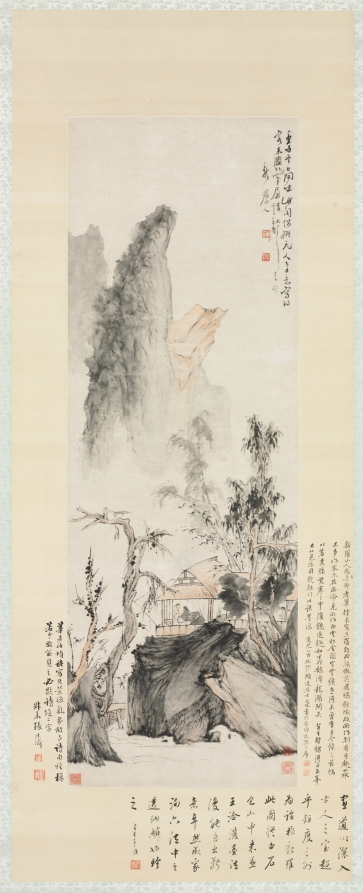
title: Conversation in Autumn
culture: China, Qing dynasty (1644-1911)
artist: Hua Yan (Chinese, 1682–c. 1765)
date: 1732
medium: Hanging scroll; ink and light color on paper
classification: Painting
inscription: Artist's inscription, signature, and 2 seals: On a winter day in the renzi year [1732], while leisurely sitting in my mountain pavilion, I happened to have imitated the brush style of Yuan masters on the two verses: "A guest came from the dusty world for a visit; in the small cottage we talked about the sound of autumn." Xin luo shan ren 新羅山人 [seals] Hua Yan 華喦; Qiuyue 秋岳.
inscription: 1 colophon and 2 seals of Zhang Tingji 張廷濟 (1768–1848): Old Hua [Yan], in this painting, was able to evoke the mood of desolation in nature and match the poetry elegantly. If Fangweng [Lu You 陸游 (1125–1210)] saw this, he would inscribe the painting with two words "idyllic world 詩境."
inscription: 新羅山人為吾鄉老輩，擅長寫生。羅致羽族，翫其飛鳴飲啄。故所作別有生趣。山水不多。作客冬在西泠，見所白雲松舎圖。空靈曠逸，得未曾有，至今憶之。兹幅以蒼秀勝，荒寒之中，復饒逸趣。如坐我鵠灣、龍瀃間矣。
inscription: 1 colophon and 1 seal of Zhu Angzhi 朱昂之 (1764–1841): The highest achievement in the art of painting is to penetrate deeply into the chamber of old masters, but at the same time transcend the bounds of conventional rules. This painting of Xinluo is derived from [the style of] Baishi (Shen Zhou 沈周, 1427–1509) and Baoshan (Lu Zhi 陸治, 1496–1576) with splashed-ink technique of Wang Qia 王洽 (Wang Mo 王默, ?–805), in addition to his own innovative ideas. Hence the distinctive style. Truly, he is one of those who passed through the net of the Six Canons [of Xie He 謝赫, 479–502]; treasure it.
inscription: 2 seals of Ye Tingguan 葉廷琯 (b. 1791); 1 seal unidentified.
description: Two figures sit conversing in a thatched cottage. This painting illustrates two poetic lines: My guest came to sit beyond the dust, In a narrow room, we talked about the autumnal sounds of autumn. Hua Yan presented an intimate world—simple and rustic—amid a landscape. The cool wilderness depicted in this work conveys an aloofness that may reveal the inner world of a scholar-artist who failed the civil service examination but preserved a sense of pride and endurance in his humble surroundings.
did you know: A barren tree on the lower left has a hole in its lower trunk through which is visible a young servant carrying food to the gentlemen in the cottage.